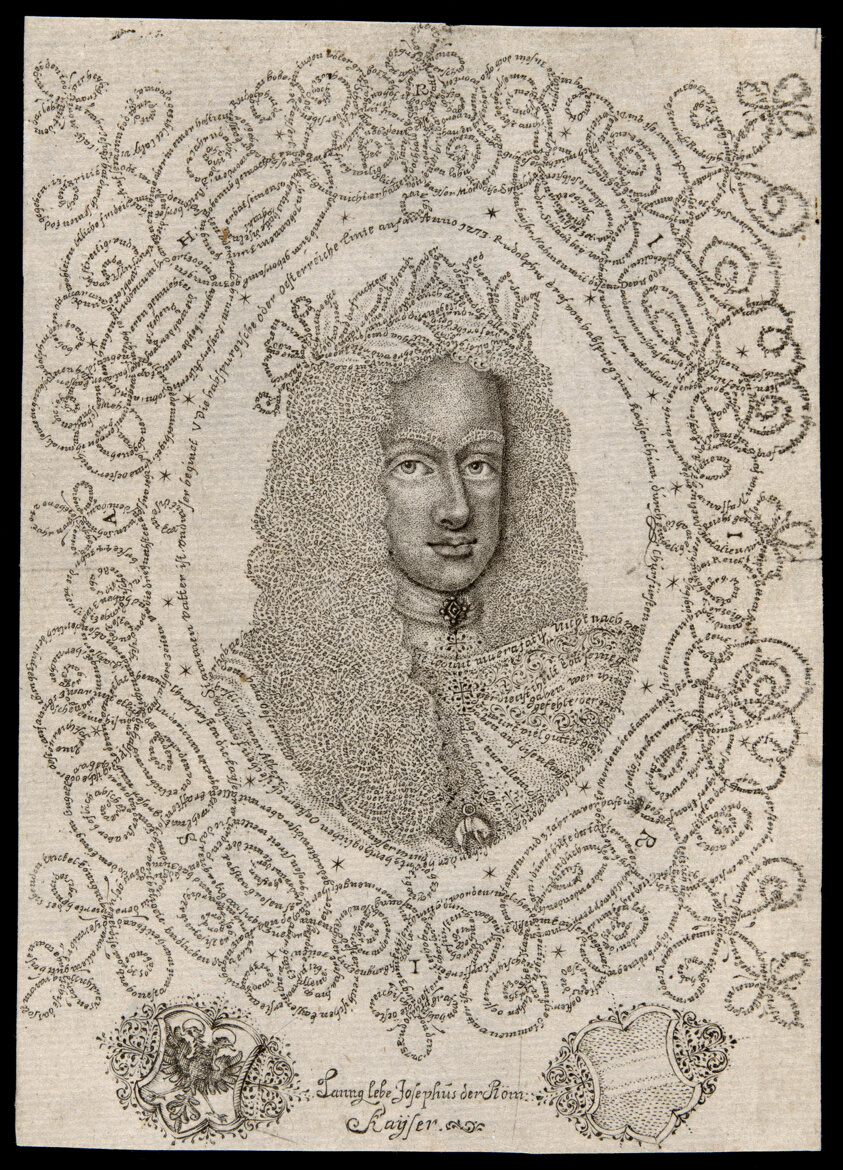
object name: Print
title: Joseph I (August), Holy Roman Emperor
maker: Johann Michael Püchler (German, active 1679-1709)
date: c. 1705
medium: Engraving in black on ivory laid paper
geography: Germany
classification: engraving; print; prints and drawing